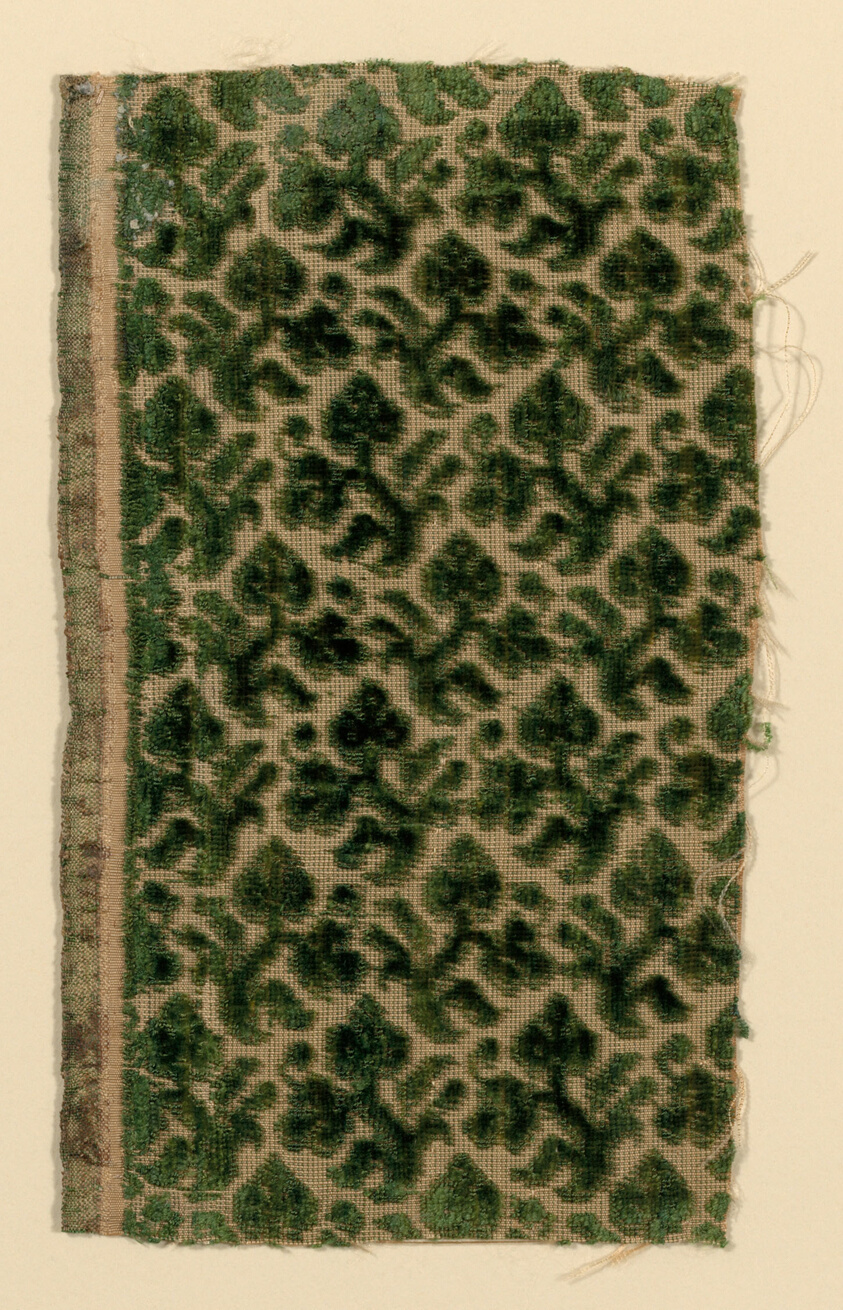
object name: Textile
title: Fragment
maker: Italy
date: 1600/25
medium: Cut and uncut velvet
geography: Italy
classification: textile; weaving - velvet